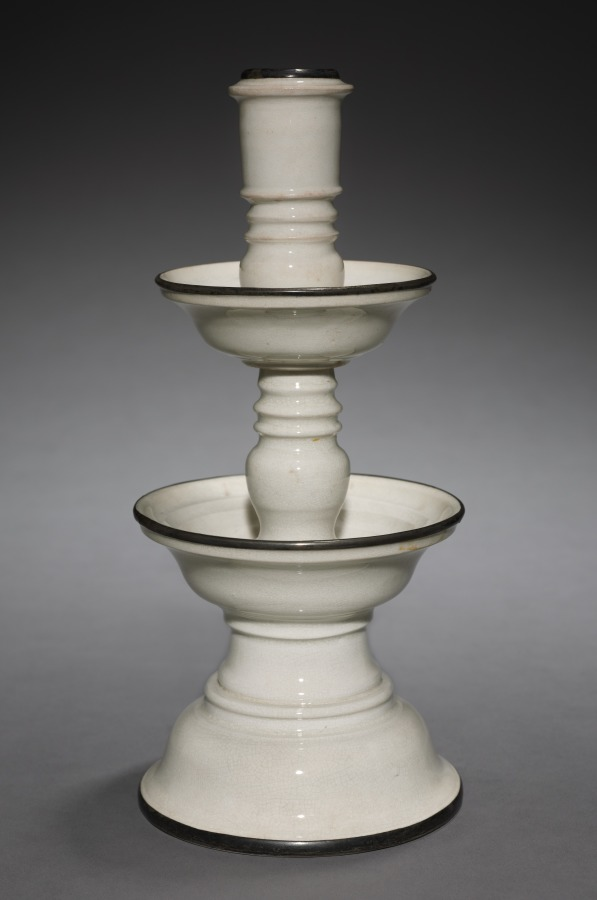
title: Candlestick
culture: China, Ming dynasty (1368–1644)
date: 1600s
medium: glazed porcelain with metal rims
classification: Ceramic